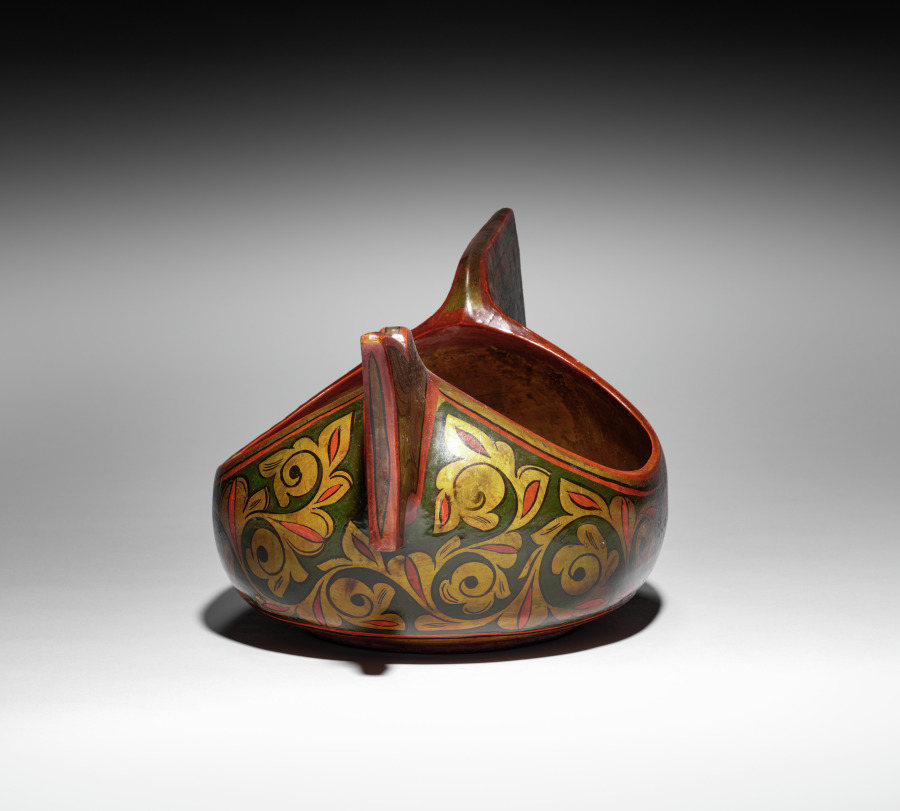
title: Wedding Cup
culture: Russia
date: before 1949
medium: lacquer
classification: Lacquer